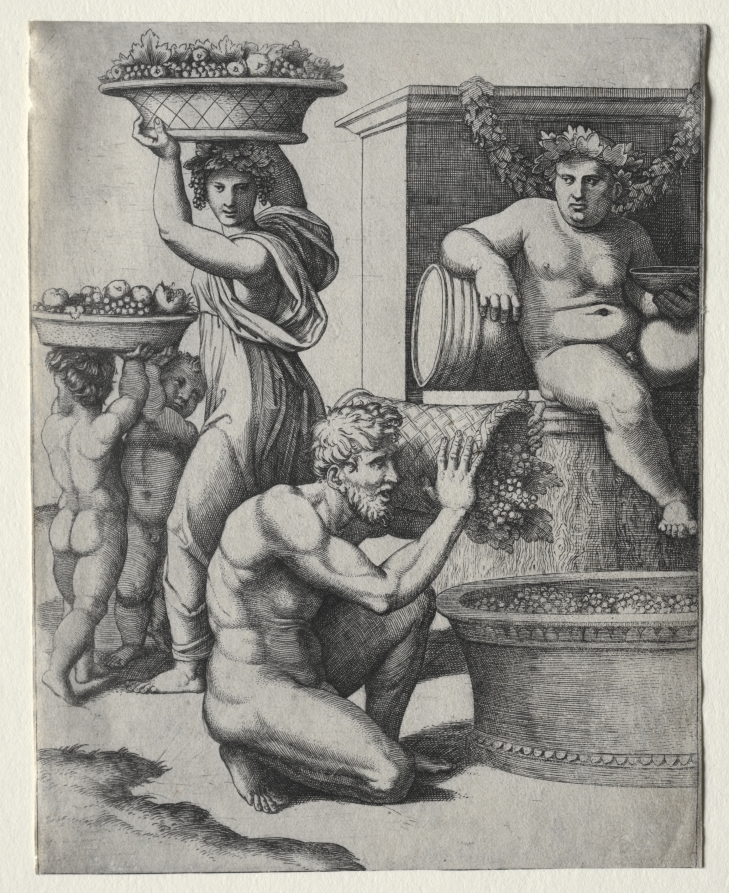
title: The Wine Press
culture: Italy, 16th century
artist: Marcantonio Raimondi (Italian, 1470/82–1527/34)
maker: after Raphael (Italian, 1483–1520)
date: c. 1517–20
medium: engraving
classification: Print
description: Here, Silenus sits thoughtfully on a throne, wine cup in hand, accompanied by harvesters who carry and transfer grapes. The composition was invented by renowned painter Raphael, with whom engraver Marcantonio Raimondi had a long-standing collaborative relationship. The powerful poses of Silenus, the crouching man, and the statuesque woman can be traced to relief-carved Roman sarcophagi (stone coffins) probably known to Raphael. The print may record part of a now-lost painted bacchanalia image made by Raphael for the Duke of Ferrara’s palace in Italy. Bacchic subject matter showed the duke to be a cultured man who also gave a good party.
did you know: Silenus, Bacchus's tutor, portrayed here watching the grape harvest with his wine cup, was known for his ability to drink wine straight from the barrel without mixing it with water (which was how mere mortals enjoyed the drink).